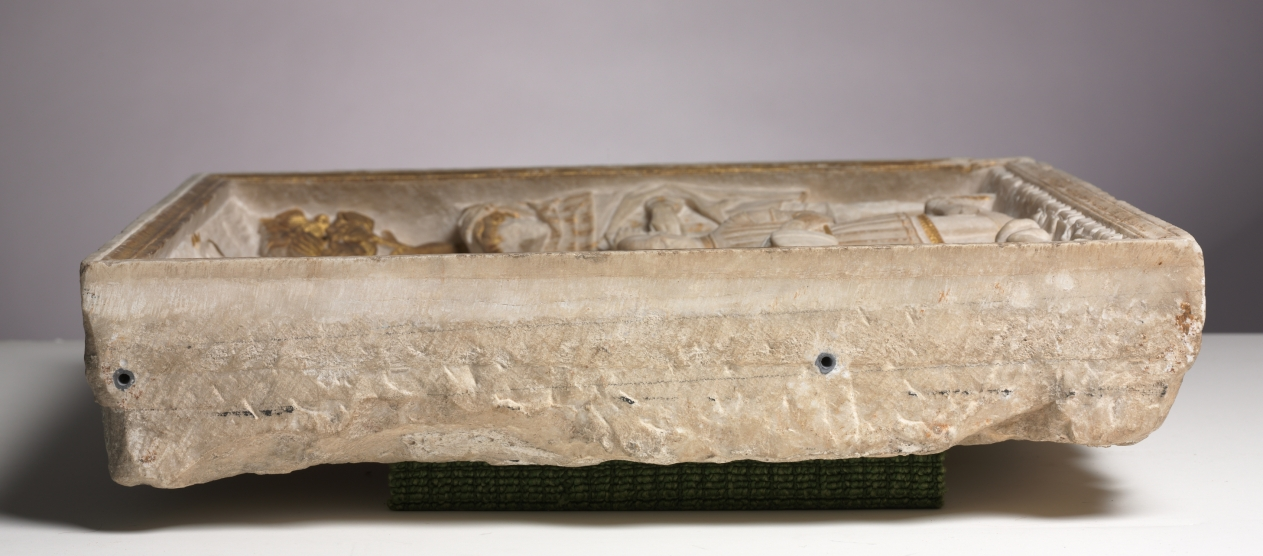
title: Pier Francesco Visconti, Court of Saliceto, Adoring the Christ Child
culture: Italy, Milan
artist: workshop of Benedetto Briosco (Italian, c. 1460–after 1514)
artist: and Tomaso Cazzaniga (Italian)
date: shortly after 1484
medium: marble with gilding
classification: Sculpture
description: This relief formed part of a public funerary monument in the church of Santa Maria del Carmine in Milan. The military leader and diplomat humbly kneels in profile before the infant Christ in a naturalistic setting, drawing attention to the Holy Family’s humanity and the deceased man’s reverence.